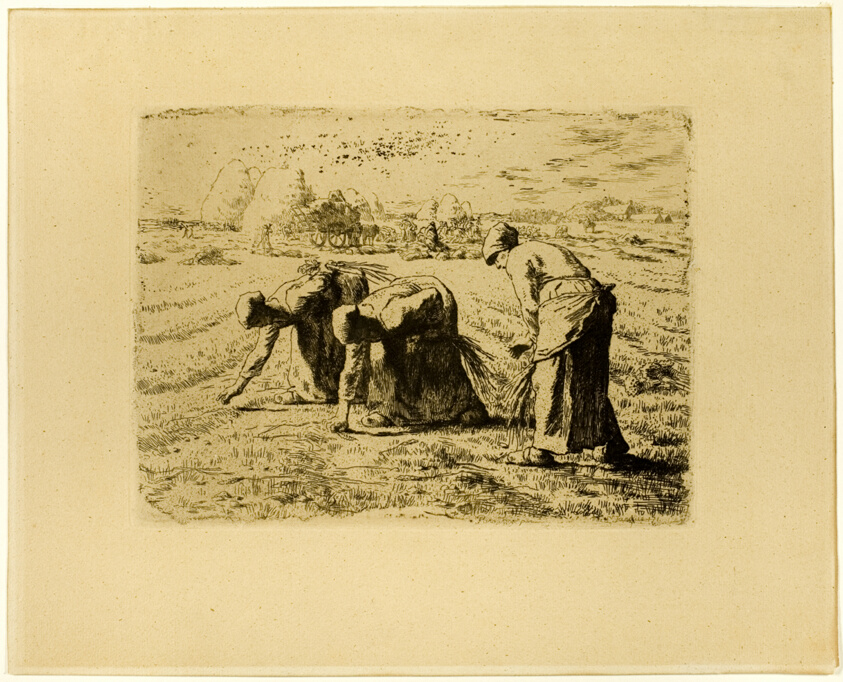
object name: Print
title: The Gleaners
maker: Jean François Millet (French, 1814-1875); printed by Auguste Delâtre (French, 1822-1907)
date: 1855–56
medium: Etching and drypoint on tan laid paper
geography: France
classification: etching; print; prints and drawing